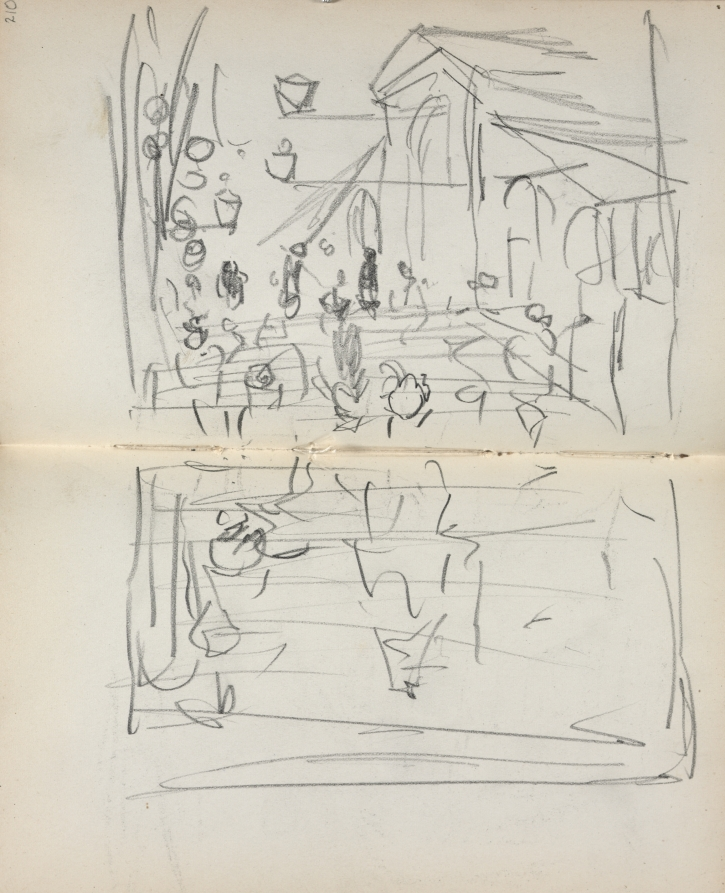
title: Italian Sketchbook: Bridge with Figures (page 209 & 210)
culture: America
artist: Maurice Prendergast (American, born Newfoundland [now Canada], 1858–1924)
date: 1898–1899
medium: pencil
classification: Bound Volume